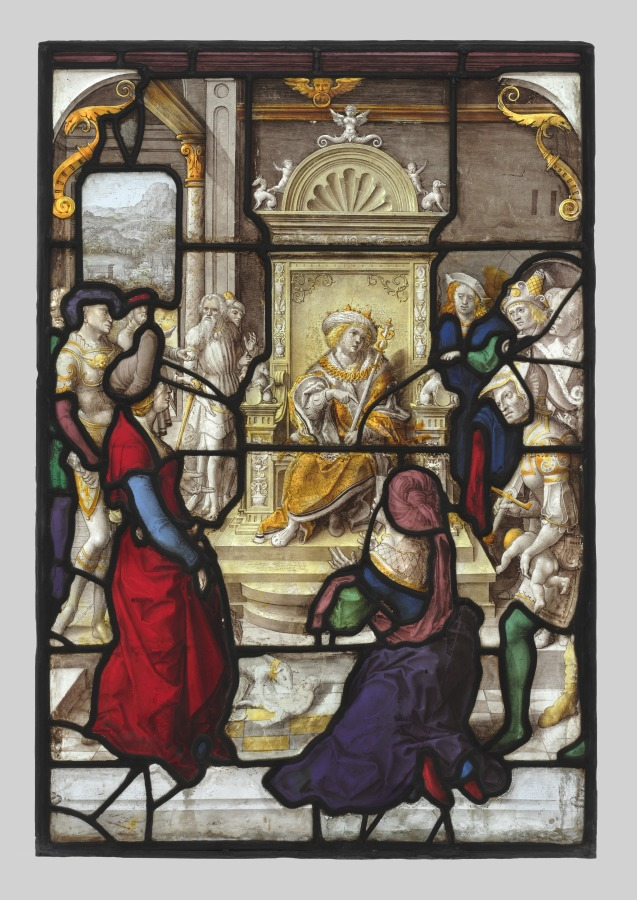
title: The Judgment of Solomon and Esther before Ahasuerus (pair)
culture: Netherlands, South Lowlands, 16th century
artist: Dirk Vellert (Netherlandish, 1480/85–1547)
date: c. 1530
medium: pot metal, white glass, and silver stain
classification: Glass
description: Though also a painter and printmaker, Dierick (or Dirk) Vellert is best known as a designer of stained glass. Active in Antwerp, where he became a master of the Guild of Saint Luke in 1511, Vellert richly ornamented his work with garlands, masks, vases, and other classically inspired motifs. A great deal of his glass was exported. As an engraver, his prints owe a good deal to Albrecht Dürer and Luca van Leyden. These two panels depict famous incidents from the Old Testament featuring the rendering of judgment. Both may have originally been made for a council chamber or a court of justice. Conceivably, because of their subjects, they could have served as models of justice for the magistrates who deliberated within view of them.